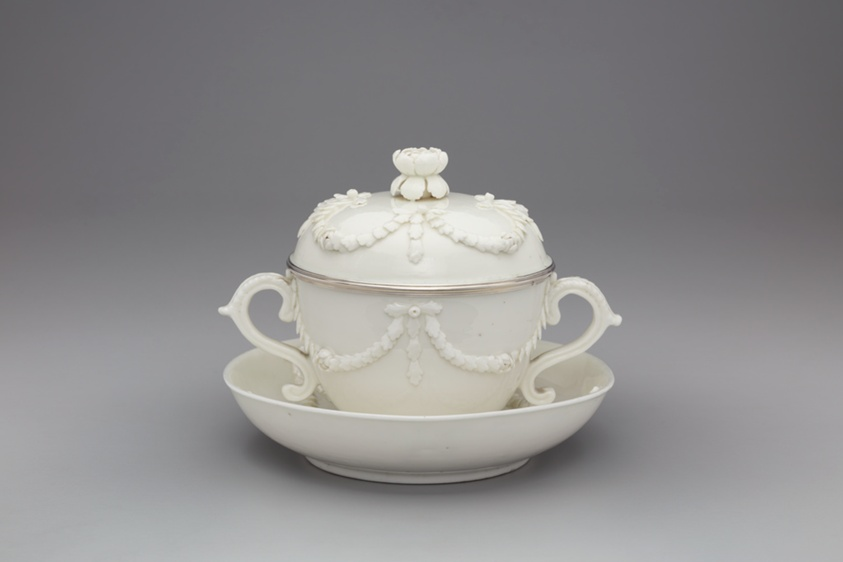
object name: Ceramics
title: Covered Bowl and Stand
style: Neoclassicism, 18th Century, Classical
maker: Mennecy Factory (France, 1750-73)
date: c. 1750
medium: Soft-paste porcelain and silver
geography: Mennecy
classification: mennecy; blanc de Chine; european decorative arts; porcelain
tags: sugar, sugar bowl, tea, tea service